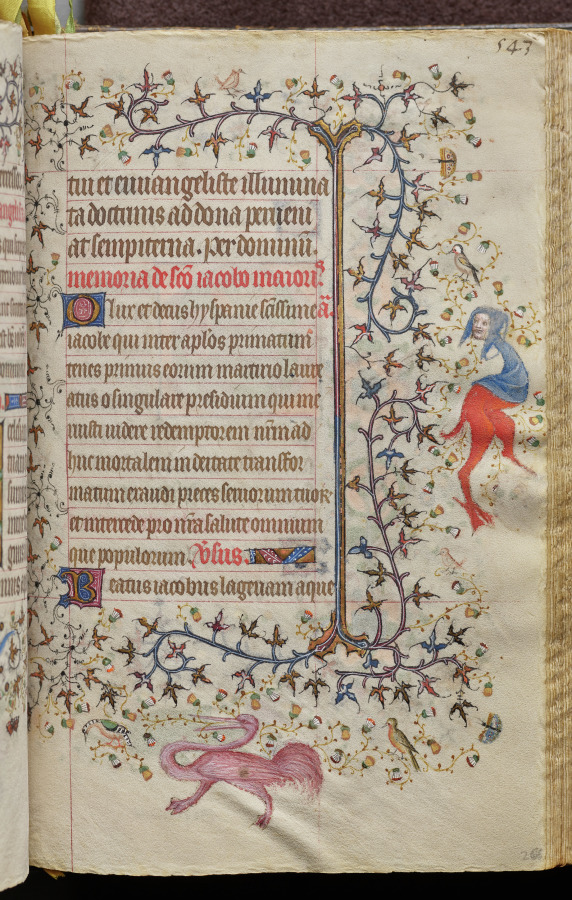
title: Hours of Charles the Noble, King of Navarre (1361-1425): fol. 266r, Text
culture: France, Paris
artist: Master of the Brussels Initials and Associates (French)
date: c. 1405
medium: ink, tempera, and gold on vellum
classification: Bound Volume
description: This precious volume was obviously highly prized by its owner, the French-born King of Navarre, who had his coat of arms painted on no less than twenty folios. Rather than directly commissioning this manuscript from a specific workshop, it seems that Charles the Noble acquired his book of hours -- perhaps ready-made for the luxury market -- while on a trip to Paris in 1404-05. A collaborative effort, six painting styles are evidenced within the pages of this codex, those of two Italians, two Frenchmen, and two Netherlanders. The painter who was responsible for the planning and decoration of the book, and who produced seventeen of the large miniatures, was a Bolognese artist known as the Master of the Brussels Initials. His principal assistant, responsible for most of the borders, was a Florentine who signed his name "Zecho" da Firenze on folio 208 verso.